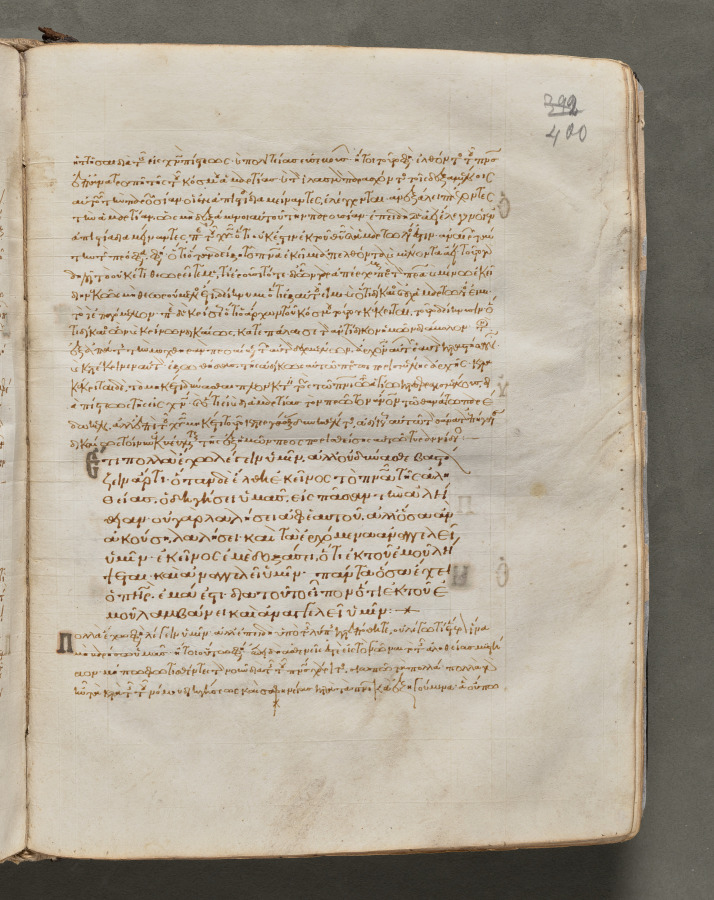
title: Text, folio 400 (recto), from a Gospel Book with Commentaries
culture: Byzantium, Constantinople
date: c. 1000–1100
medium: ink, tempera, and gold on vellum; leather binding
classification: Bound Volume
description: Each of the four gospels in this book opens on a page with brilliantly illuminated borders depicting the author of the text as well as birds—principally peacocks, symbols of the immortality of the soul—and fountains, representing the fountain of life and the salvation of the soul. This volume consists of 428 leaves with texts in Greek. Its level of sophistication suggests that it was probably written and decorated in a monastery in Constantinople.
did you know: Gospel books were carried in procession through Byzantine churches.